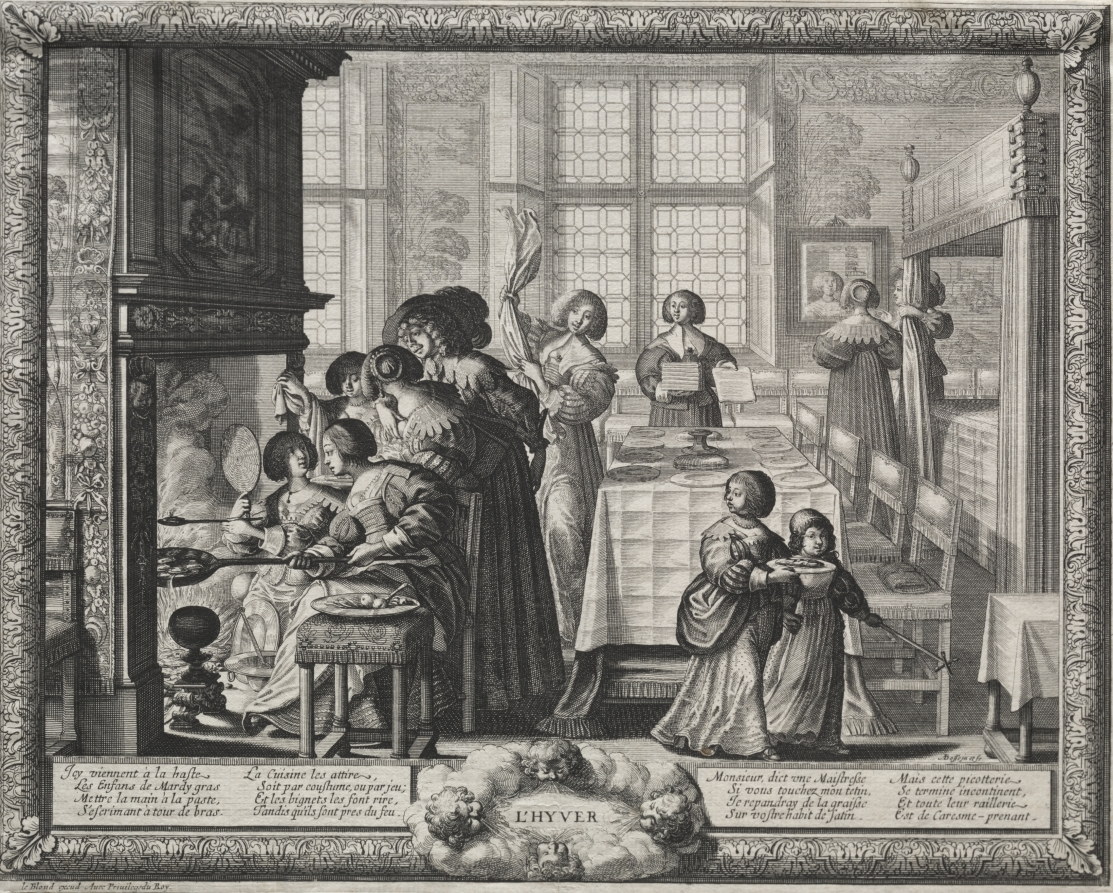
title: The Four Seasons: Winter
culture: France, 17th century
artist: Abraham Bosse (French, 1602–1676)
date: 1635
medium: engraving and etching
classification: Print